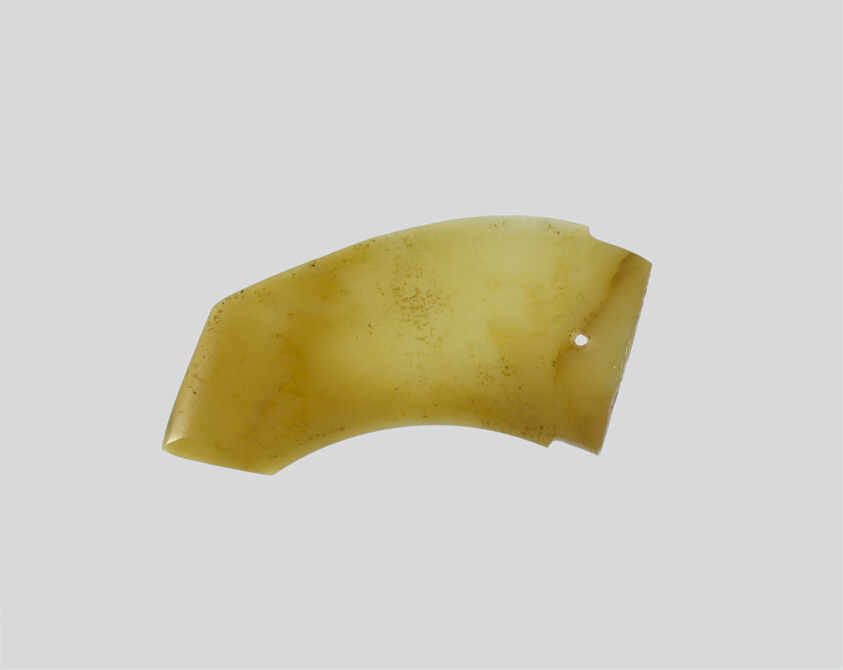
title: Dagger axe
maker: China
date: Shang dynasty (c.1600–1050 BC)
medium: Jade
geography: China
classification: jade; asian art